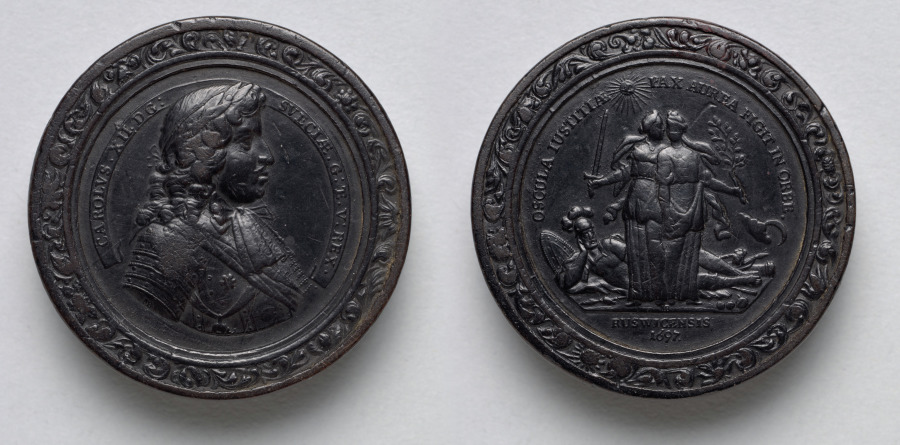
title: Gaming Piece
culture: Germany, late 17th-early 18th Century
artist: Martin Brunner (German, 1659–1725)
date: c.1700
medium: wood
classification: Furniture and woodwork